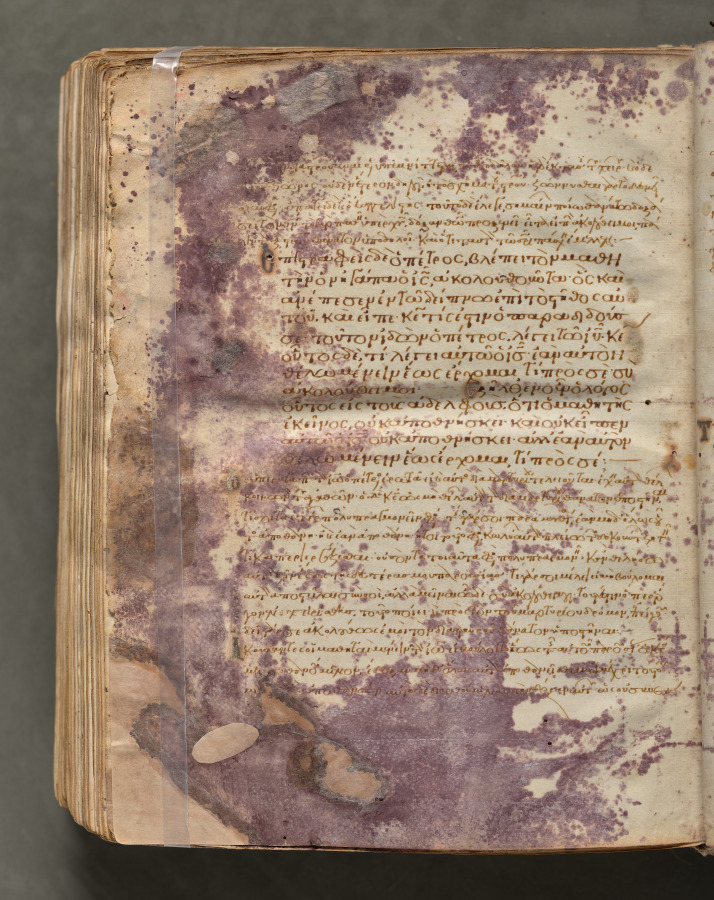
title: Text, folio 424 (verso), from a Gospel Book with Commentaries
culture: Byzantium, Constantinople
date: c. 1000–1100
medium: ink, tempera, and gold on vellum; leather binding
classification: Bound Volume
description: Each of the four gospels in this book opens on a page with brilliantly illuminated borders depicting the author of the text as well as birds—principally peacocks, symbols of the immortality of the soul—and fountains, representing the fountain of life and the salvation of the soul. This volume consists of 428 leaves with texts in Greek. Its level of sophistication suggests that it was probably written and decorated in a monastery in Constantinople.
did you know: Gospel books were carried in procession through Byzantine churches.